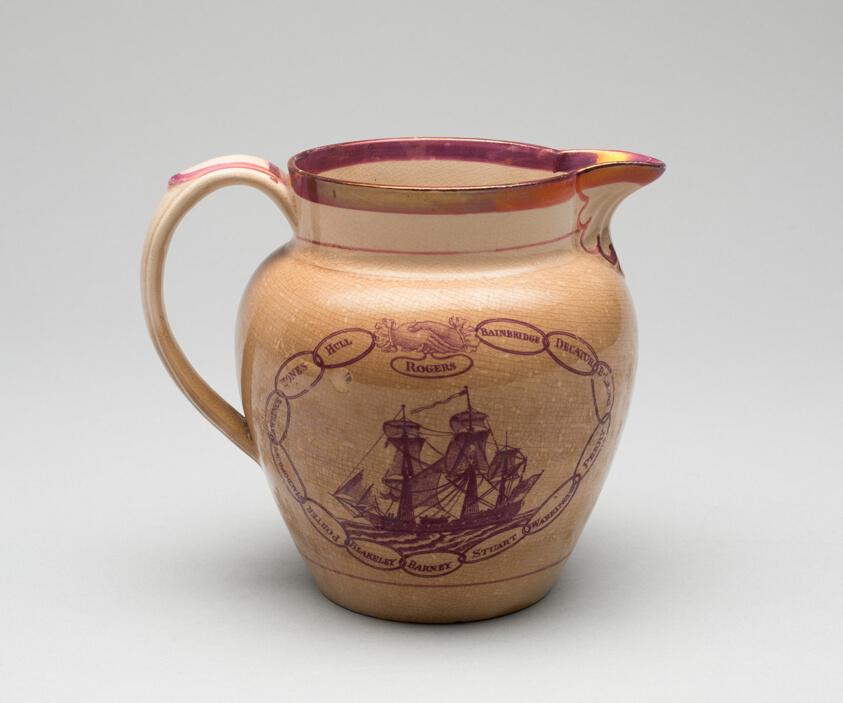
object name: Decorative Arts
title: Jug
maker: English for the American market; Shelton, Staffordshire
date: 1800–25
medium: Earthenware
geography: Staffordshire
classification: vessel; earthenware; american decorative arts; ceramics; decorative arts